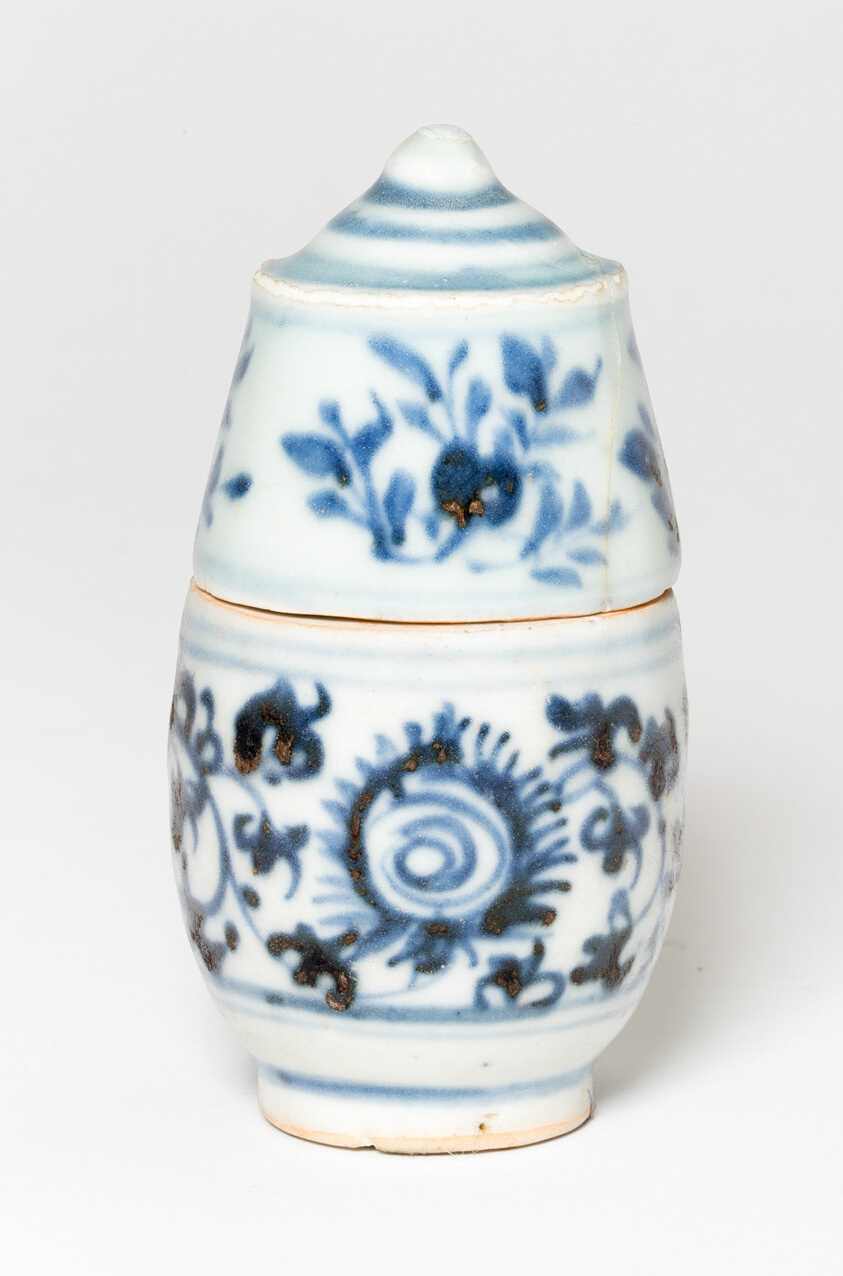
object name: Vessel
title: Covered Jar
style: annamese, vietnamese, Southeast Asian, asian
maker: Vietnam (Annamese)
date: 15th century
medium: Stoneware painted in underglaze blue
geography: Vietnam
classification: porcelain; asian art; ceramics; vessel